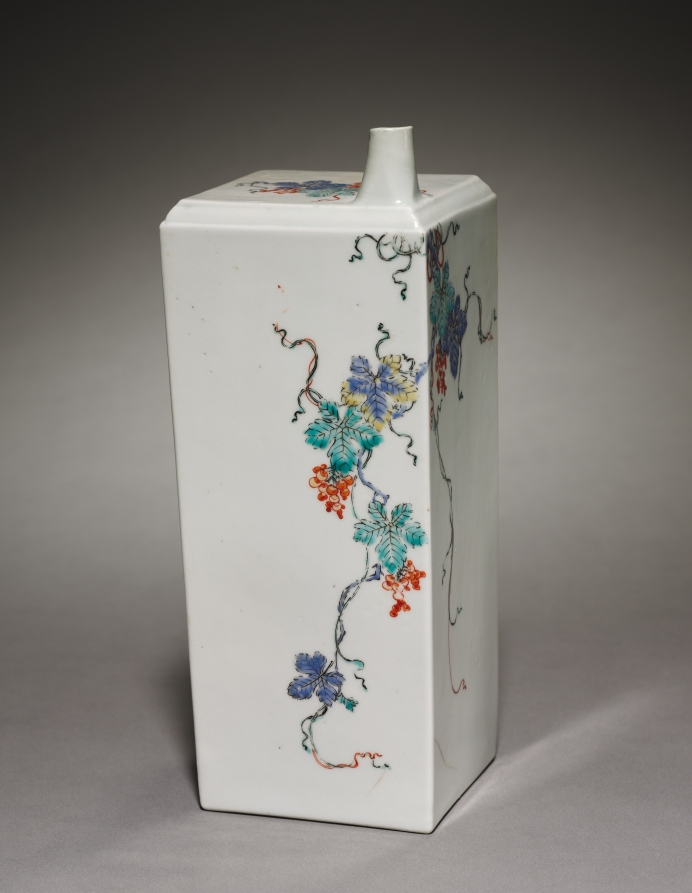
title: Square Bottle with Squirrel and Grapes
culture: Japan, Edo period (1615–1868)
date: late 1600s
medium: porcelain with overglaze color enamel (possibly Hizen ware, Kakiemon type)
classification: Ceramic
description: In the 1600s, Korean and Japanese elites could enjoy wine from Europe. In his 1636 travel diary called Haecharok, Kim Seryeom, a vice director of Korean envoys to Japan, recorded that the head of Japan’s Tsusima Island treated him to Western red wine. Therefore, export porcelain ware like Square Bottle with Squirrel and Grapes could have been made as a wine bottle.